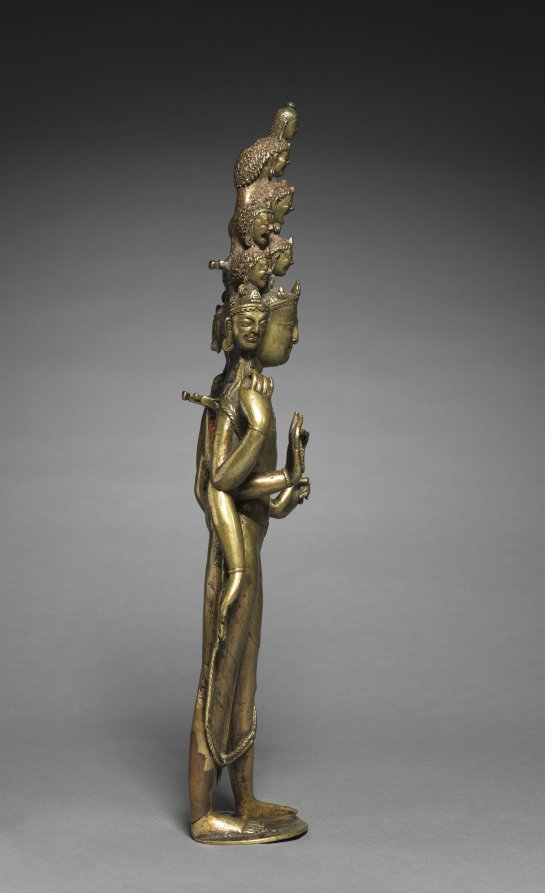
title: Eleven-Headed Bodhisattva of Compassion (Avalokiteshvara)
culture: Western Himalayas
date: around 1000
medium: gilt bronze with silver and copper inlay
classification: Sculpture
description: One of the finest surviving examples of its kind, this rare six-armed form of Avalokiteshvara has the slender athletic figure and penetrating expression associated with the art of Kashmir, the main source for western Tibetan styles. This Bodhisattva combines the qualities of a prince and an ascetic, with his crown and jewels combined with the yogi's antelope skin over his left shoulder and prayer beads in his middle right hand. Representing the range of Avalokiteshvara's forms and aspects, his eleven heads are remarkably articulated with individualized features. They follow textual descriptions that describe his three placid faces, three fierce faces, three terrifying howling faces, and one laughing face, all surmounted by a head of the Buddha Amitabha, with whom he is closely associated. Tongues and lips have been inlaid with copper to extraordinary effect, and a miniature seated figure of Amitabha Buddha has been placed in the center of every crown.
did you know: The bottle in his lower-left hand contains the nectar of immortality.